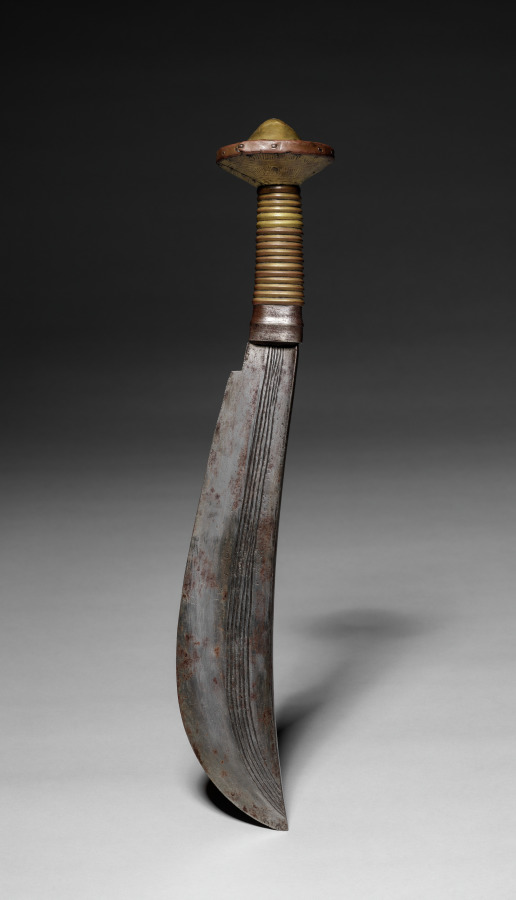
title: Knife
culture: Africa, Central Africa, Democratic Republic of Congo, unknown maker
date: 1800s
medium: Iron, wood, and copper alloy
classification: Arms and Armor